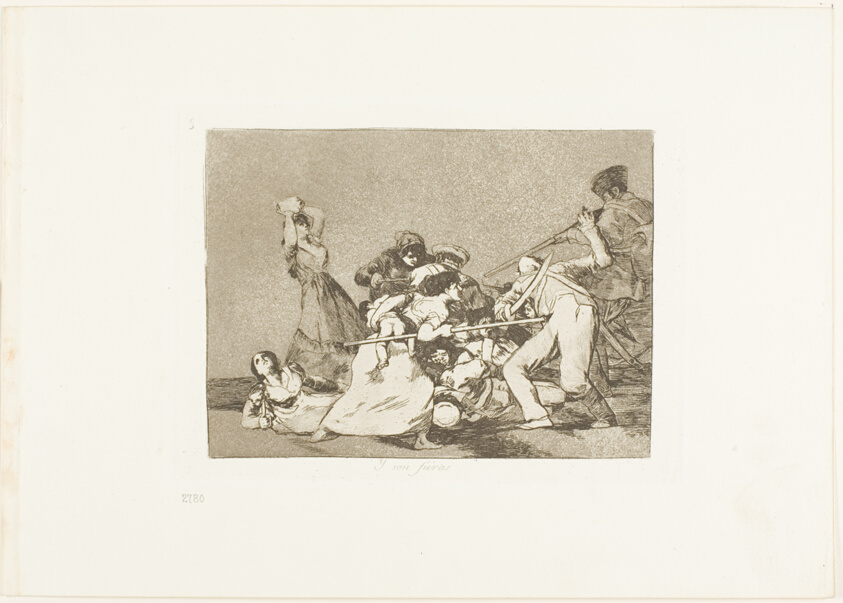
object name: Print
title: And they are like wild beasts, plate five from The Disasters of War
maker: Francisco José de Goya y Lucientes (Spanish, 1746-1828)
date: 1812/15, published 1863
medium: Etching, burnished aquatint, and drypoint on ivory wove paper with gilt edges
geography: Spain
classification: etching; print; prints and drawing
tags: war